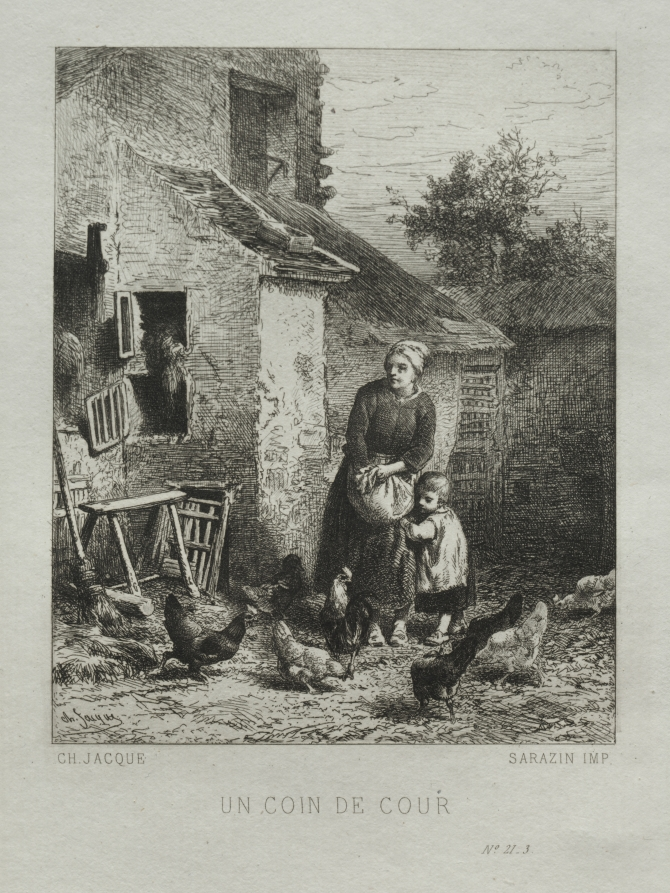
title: A Corner of the Yard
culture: France, 19th century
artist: Charles-Émile Jacque (French, 1813–1894)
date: 1864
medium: etching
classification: Print